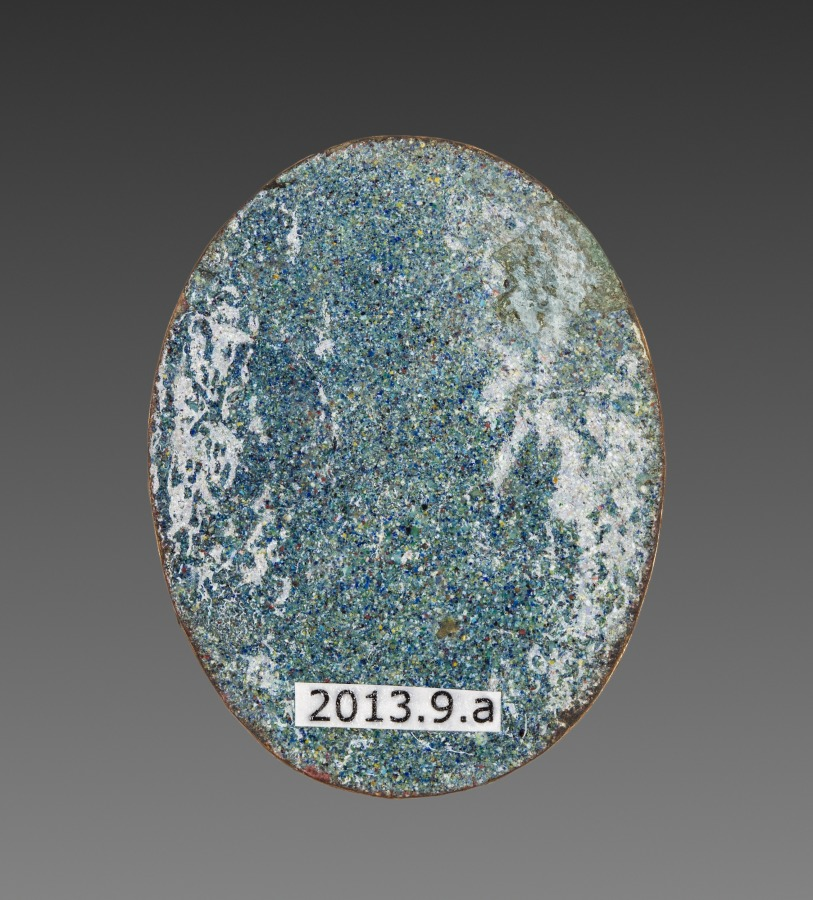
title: Locket Panel (1 of 4)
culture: France, 19th century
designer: Alexis Falize (French, 1811–1898)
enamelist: Antoine Tard (French, active 1860–1889)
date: 1800s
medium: gold and cloisonné enamel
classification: Jewelry